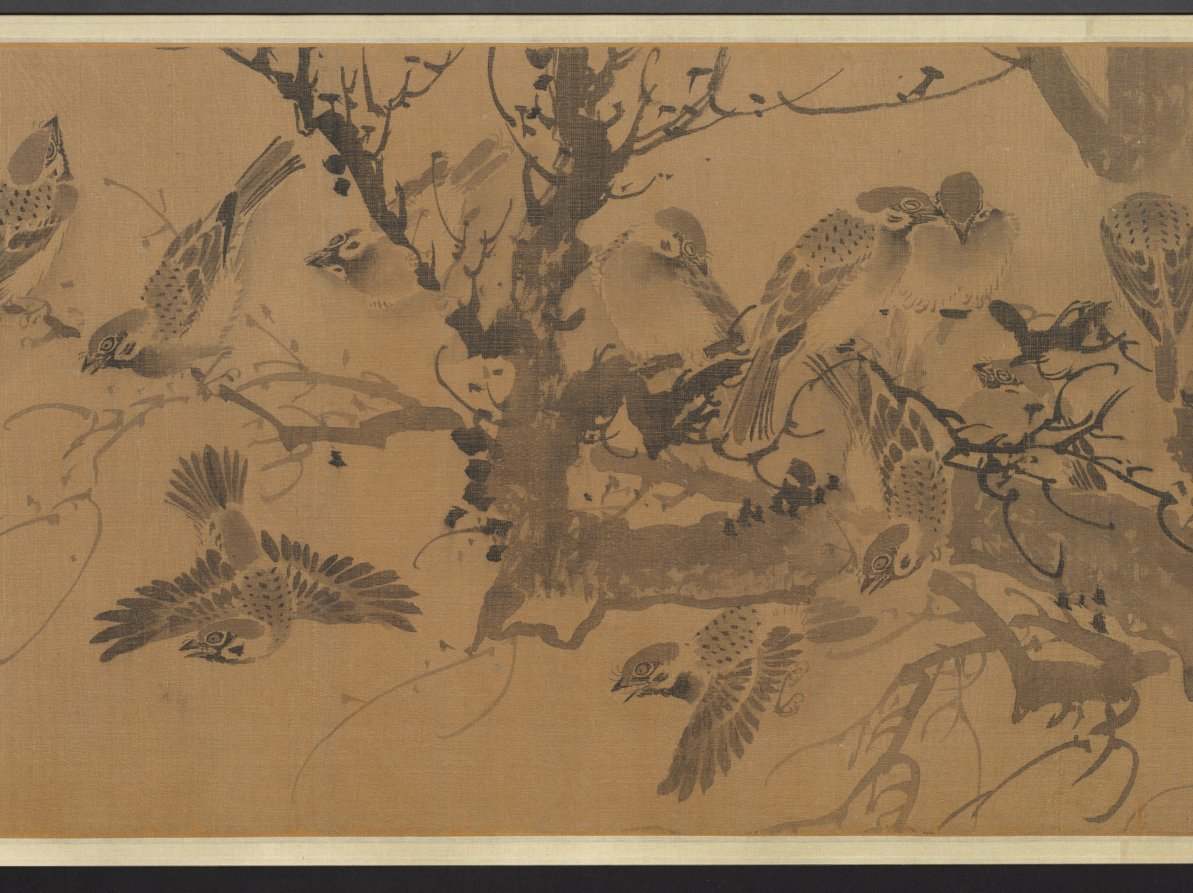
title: A Hundred Sparrows in a Lofty Grove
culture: China, Ming dynasty (1368–1644)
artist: attributed to Lin Liang (Chinese, 1416–1480)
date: 1368–1644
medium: handscroll; ink on silk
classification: Painting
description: Sparrows engaged in all kinds of activities frolic amid leafy branches, blades of grass, rocks, and a waterfall. As our eyes move over the scroll, the artist engages us in enjoying the sparrows’ carefree movements in a natural setting. The charming birds were painted from close observation in swift and fluent brushstrokes. Sparrows are a common bird and in Chinese painting they often represent the commoner in human society as opposed to the noble pheasant or peacock representative of the ruling class.